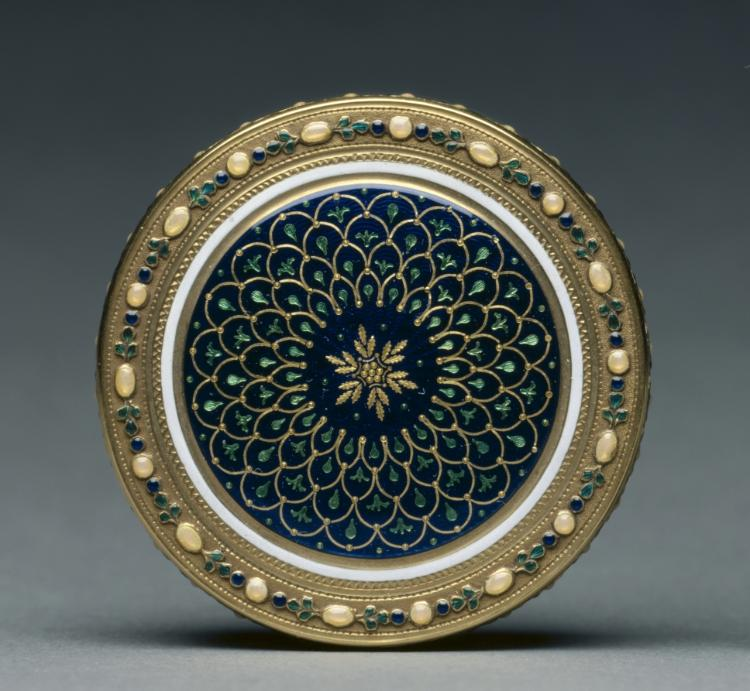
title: Powder Box (Poudrier)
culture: France, 18th century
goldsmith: Jean-Joseph Barrière (French)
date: 1779–80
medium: enamel on gold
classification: Miscellaneous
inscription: [Maker's mark of Jean-Joseph Barrière, master goldsmith in 1763, bottom; exterior wall; inside cover]: "JJB"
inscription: [Warden's mark for Paris, 1779-1780, exterior wall]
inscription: [Discharge mark of Henry Clavel I, Paris, 1780-1782, exterior wall]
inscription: [Counter-mark of Henry Clavel I and Jean-Francois Kalendrin, Paris,1782-1789, exterior wall]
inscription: [Restricted warranty mark for gold, Paris, exterior wall]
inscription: [Three illegible marks, bottom]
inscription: [Three illegible marks, cover]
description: In the 1700s ornately enameled boxes became a popular accessory in the French court. These boxes often held powdered tobacco, called snuff. However, this box, which is unhinged, likely held powder, rouge, or face cream. Pageantry and performance were important aspects of social interaction during this period. The extravagant designs and associated functions of these boxes communicated social and political status.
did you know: Jean-Joseph Barrière received his designation of master goldsmith in 1763, a coveted title that required candidates to complete a lengthy apprenticeship followed by a test of skill.